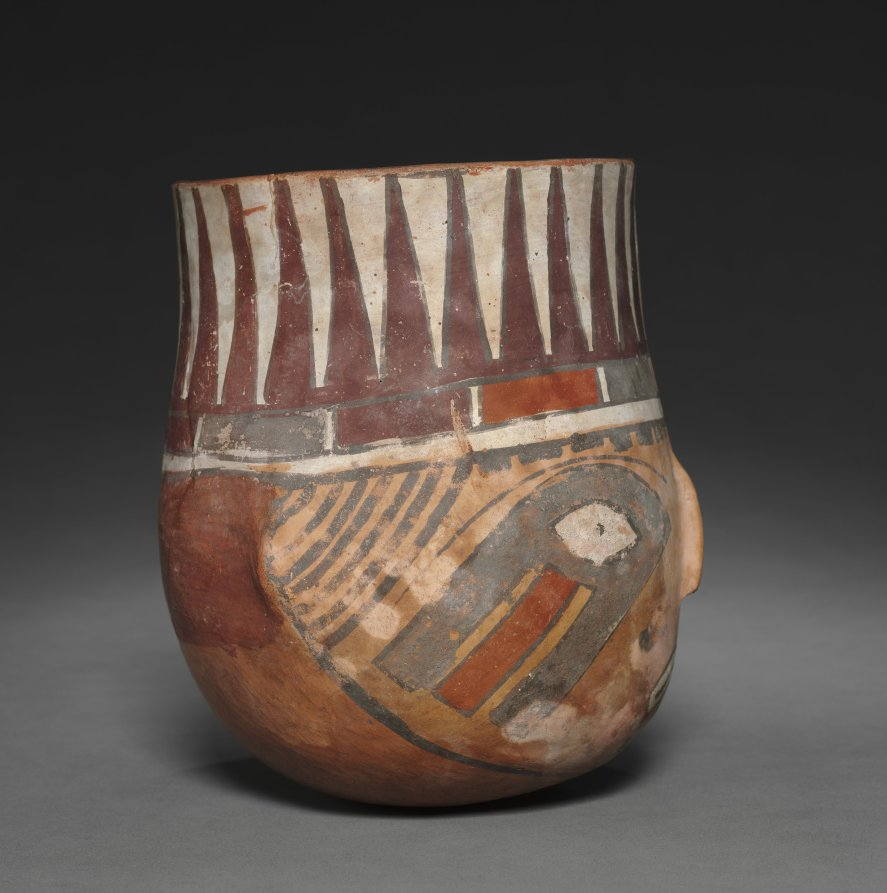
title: Vase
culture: Peru, South Coast, Nasca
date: c. 300–500 CE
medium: pottery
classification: Ceramic